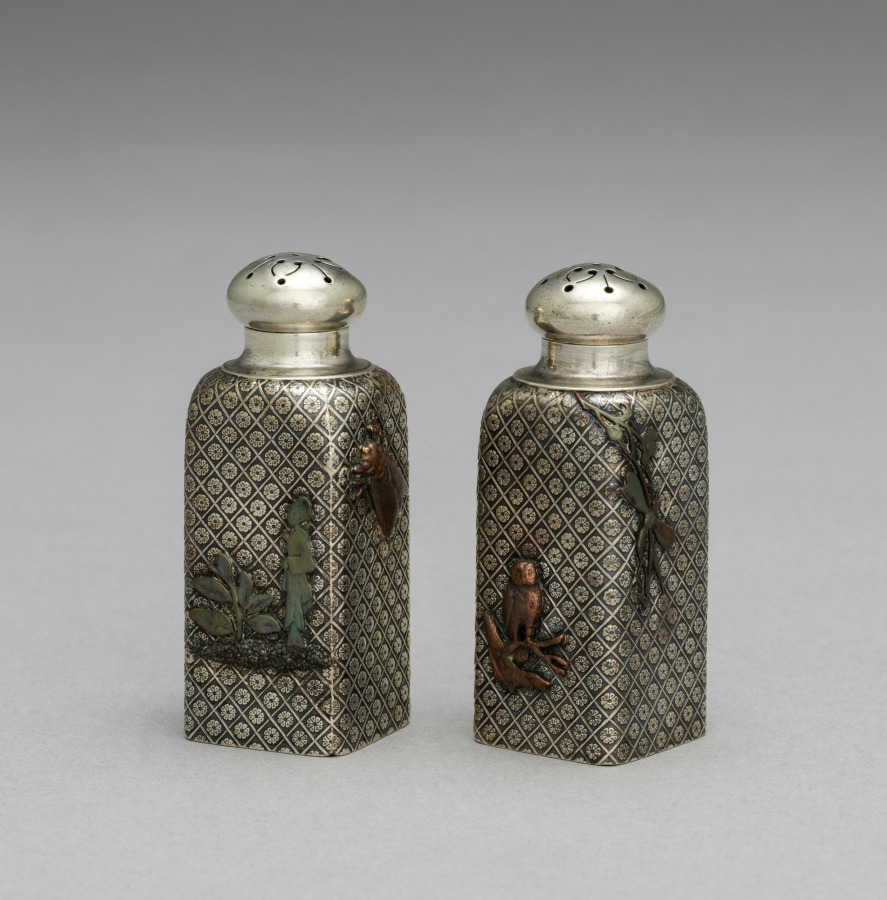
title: Salt and Pepper Shakers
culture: America, Rhode Island, Providence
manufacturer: Gorham Manufacturing Company (America, est. 1831)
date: c.1875–85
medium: silver and mixed metals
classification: Silver